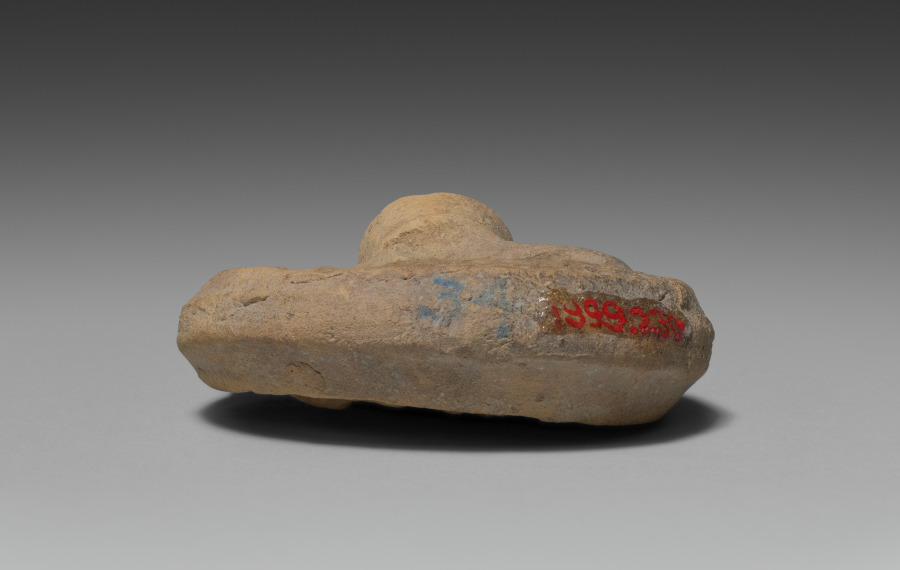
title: Pilgrim's Flask with Saint Menas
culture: Egypt, Coptic period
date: 400–600 CE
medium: terracotta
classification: Ceramic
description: These flasks bear the image of Saint Menas, an early martyr of the Christian Church whose shrine was in the desert southwest of Alexandria in Egypt. These flasks were probably used by pilgrims to hold oil taken from the lamp that burned over this saint's tomb. Probably manufactured near the shrine, pilgrim's flasks often bear decorations hinting at their place of origin, as is the case here.